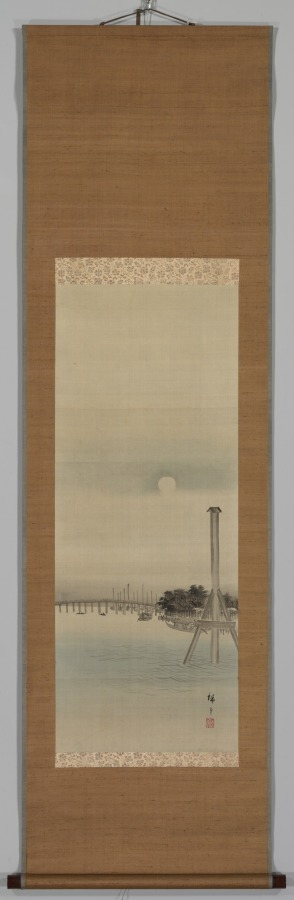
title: Night Scene on the Sumida River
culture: Japan, Edo period (1615–1868)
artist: studio of Utagawa Hiroshige (Japanese, 1797–1858)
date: 1800s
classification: Painting